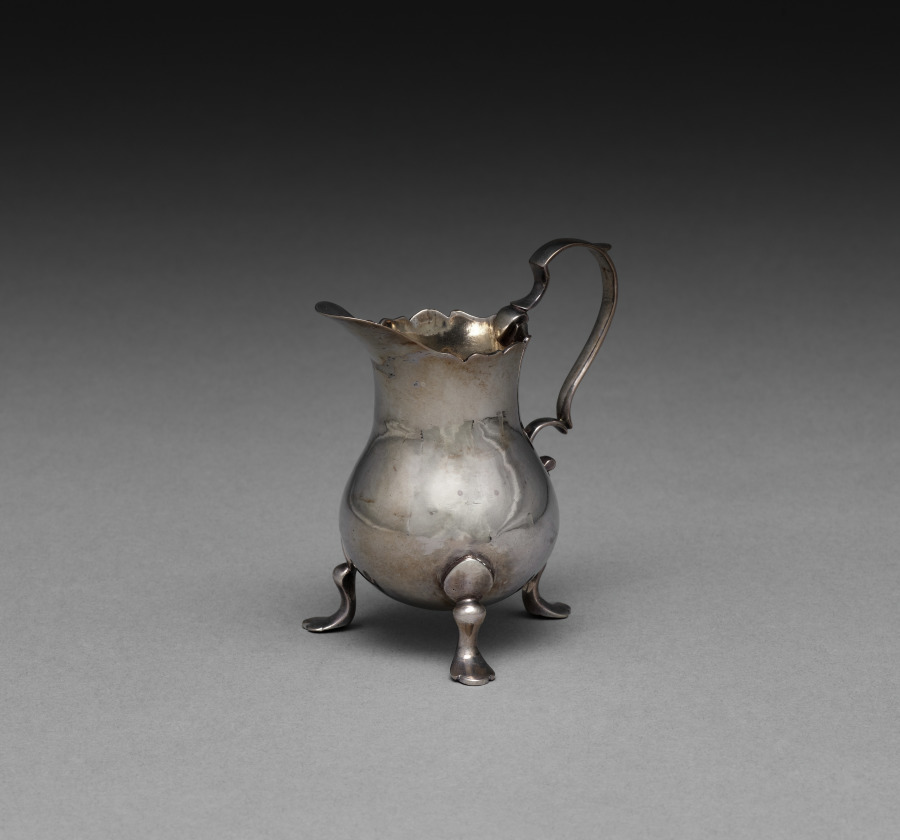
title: Cream Jug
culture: America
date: c. 1760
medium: silver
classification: Silver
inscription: engraved "S" and "D*I" in block letters on bottom along with a treelike device.